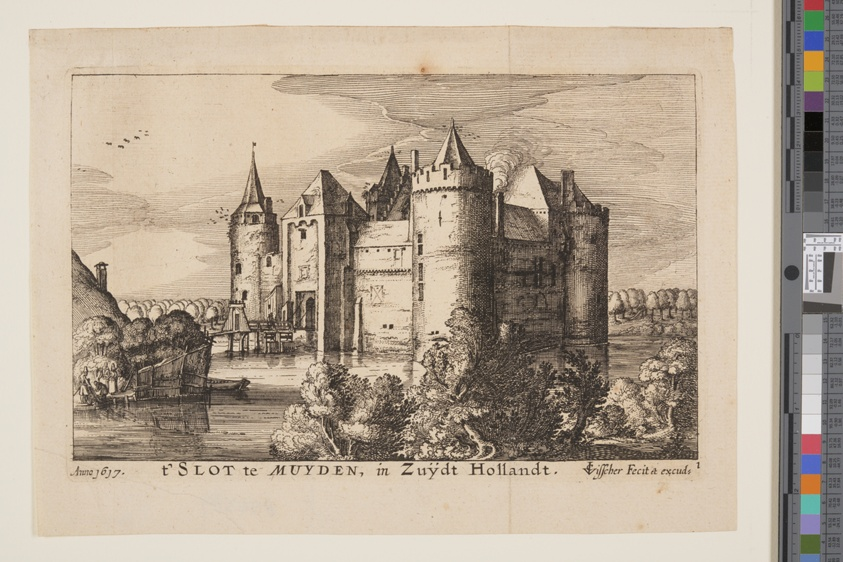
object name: Print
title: The Castle of Muiden (in reverse), from Four Castles in Holland and Utrecht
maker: Claes Jansz. Visscher (Netherlandish, c. 1550–c. 1612)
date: 1617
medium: Etching on ivory laid paper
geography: Netherlands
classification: print; paper; prints and drawing; etching